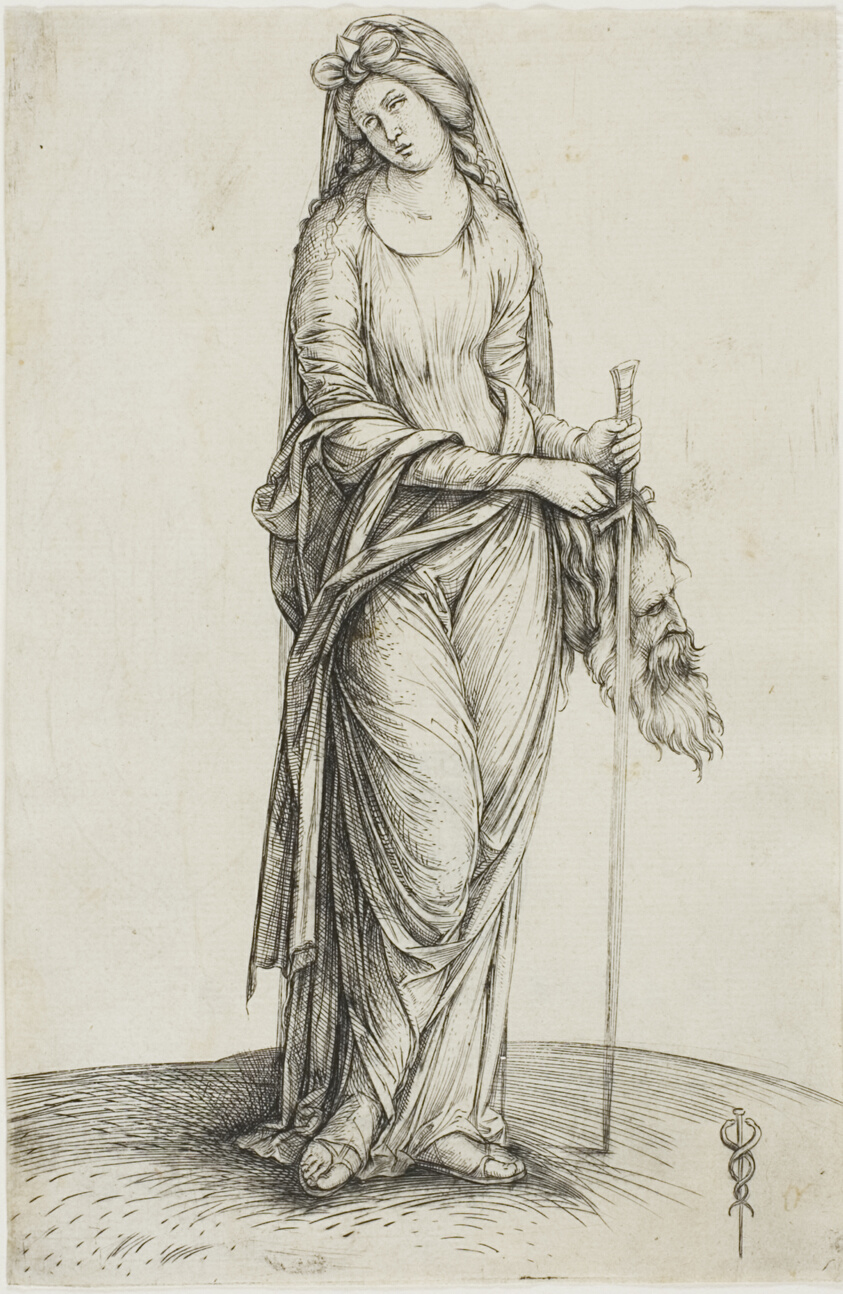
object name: Print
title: Judith Holding the Head of Holofernes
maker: Jacopo de' Barbari (Italian, 1460/70-before July 1516)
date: c. 1500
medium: Engraving in black on ivory laid paper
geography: Italy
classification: engraving; print; prints and drawing